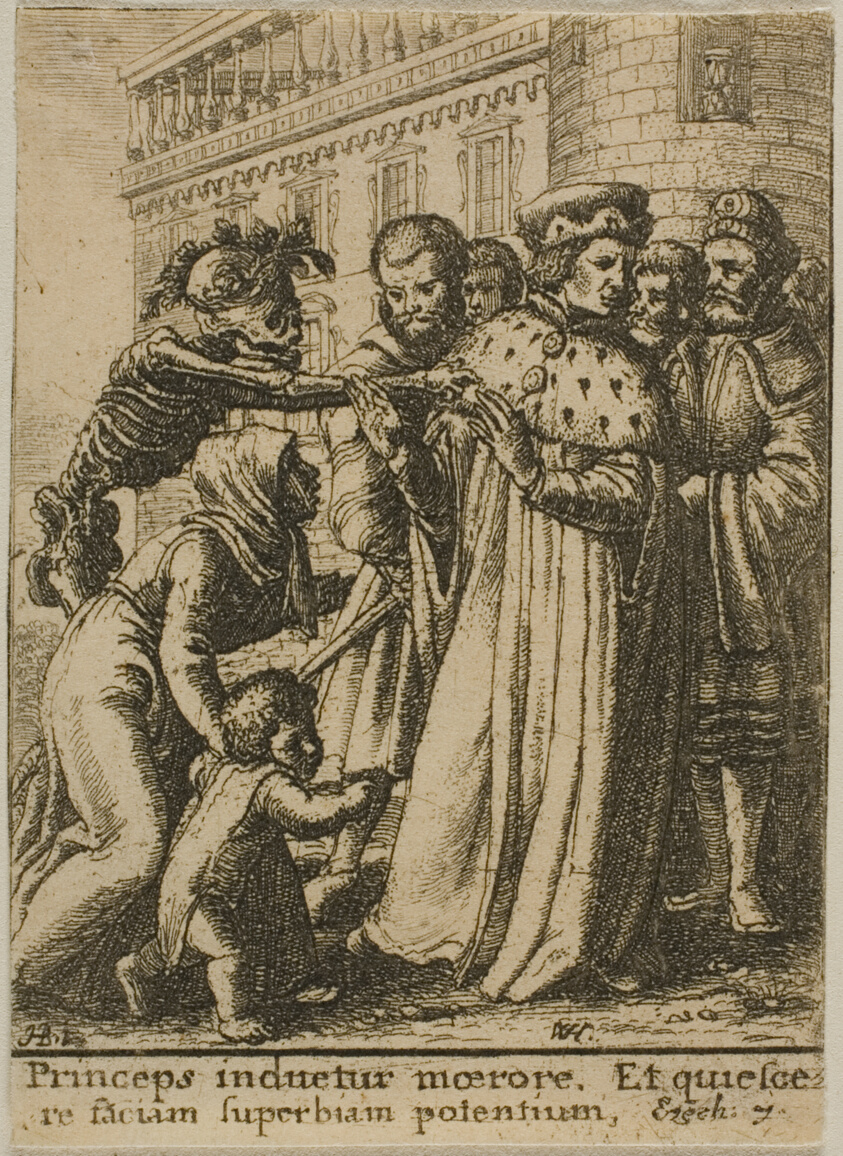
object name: Print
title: The Duke and Death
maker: Wenceslaus Hollar (Bohemian, 1607-1677); after Hans Holbein the younger (German, c.1497-1543)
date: 1651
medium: Etching on ivory wove paper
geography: Bohemia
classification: etching; print; prints and drawing